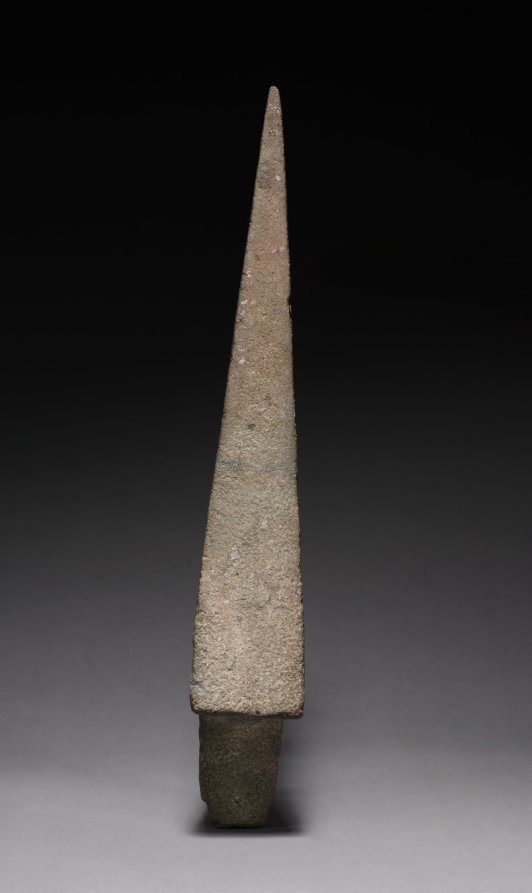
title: Ballgame Thin Stone Head (Hacha)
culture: Mexico, Gulf Coast, Classic Veracruz style (600-1100)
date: 600–900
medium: stone, pigment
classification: Sculpture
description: A tapering headdress, its base formed by a grotesque head with upturned snout, soars above a human face in this elegant thin stone head. Such heads, known as hachas, probably were used in ballgame ceremonies, though how is unclear. Equally obscure are the heads’ identities, perhaps heroic, idealized players, ballgame patrons, or characters from the game’s lore. The large area of red pigment on one side may have been sprinkled onto the head after it was buried in an offering or a tomb.